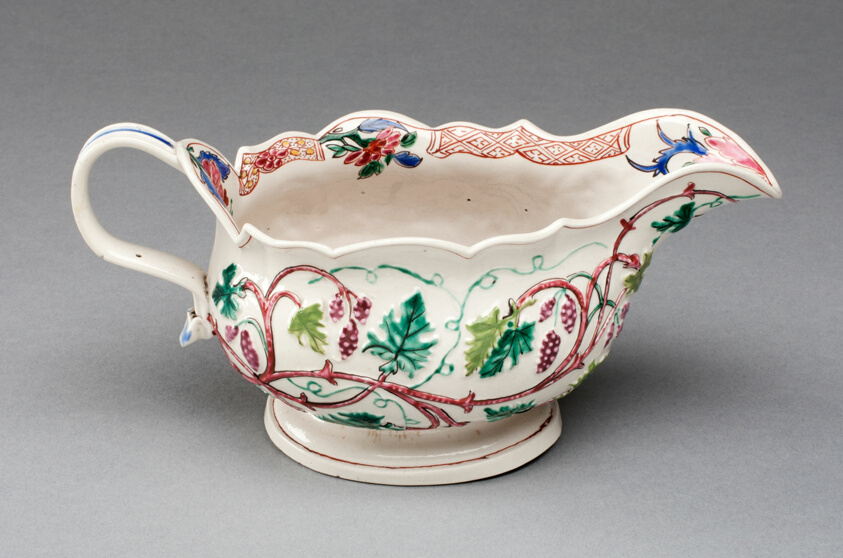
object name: Ceramics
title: Sauceboat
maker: Staffordshire, England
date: c. 1750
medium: Salt-glazed stoneware, polychrome enamels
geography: Staffordshire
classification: salt-glazed stoneware; european decorative arts; ceramics; stoneware